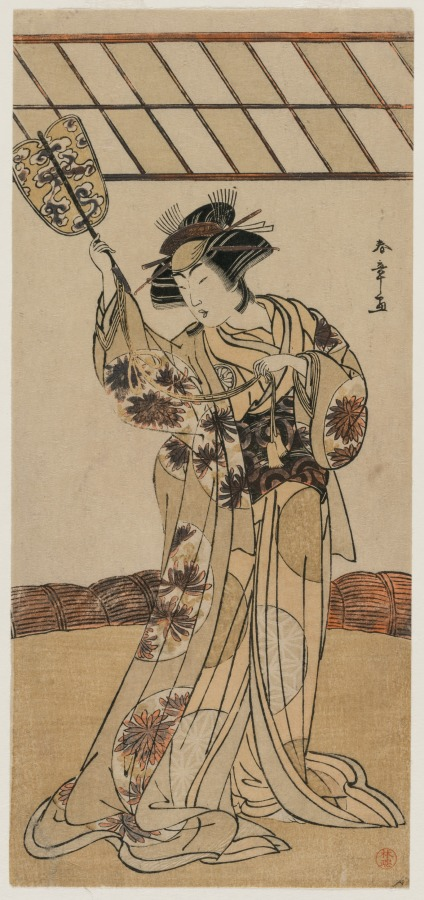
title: Segawa Kikunojō III as Teruha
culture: Japan, Edo period (1615–1868)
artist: Katsukawa Shunshō (Japanese, 1726–1792)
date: 1778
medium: color woodblock print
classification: Print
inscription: Signature: Shunsho ga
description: Men perform all the roles in Kabuki, a form of Japanese theater. Some actors specialize in onnagata (女形), or female roles. Segawa Kikunojō III was one of the most famous onnagata actors of his day. Here, he plays a character called Teruha in what was once the center print of a triptych (a composition of three prints). Teruha is officiating a wrestling match that also involves red and white roosters.